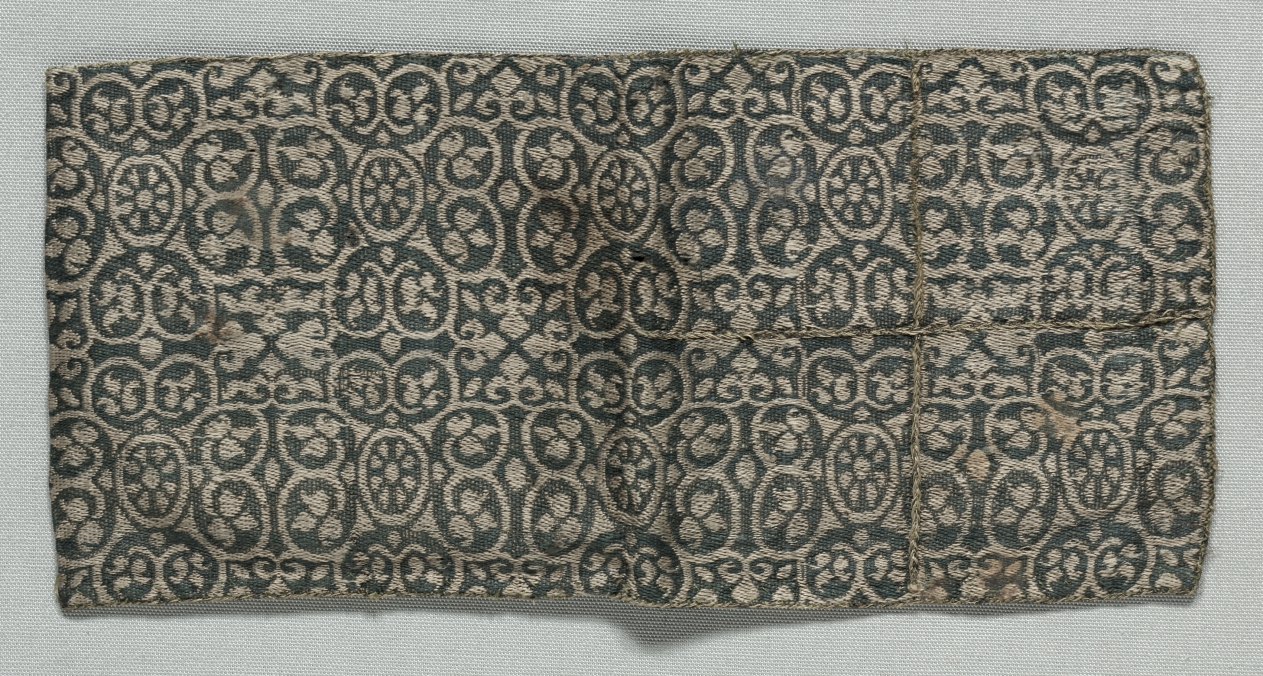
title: Reliquary(?) Bag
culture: Italy or Spain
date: 1200s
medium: silk: compound twill weave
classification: Textile